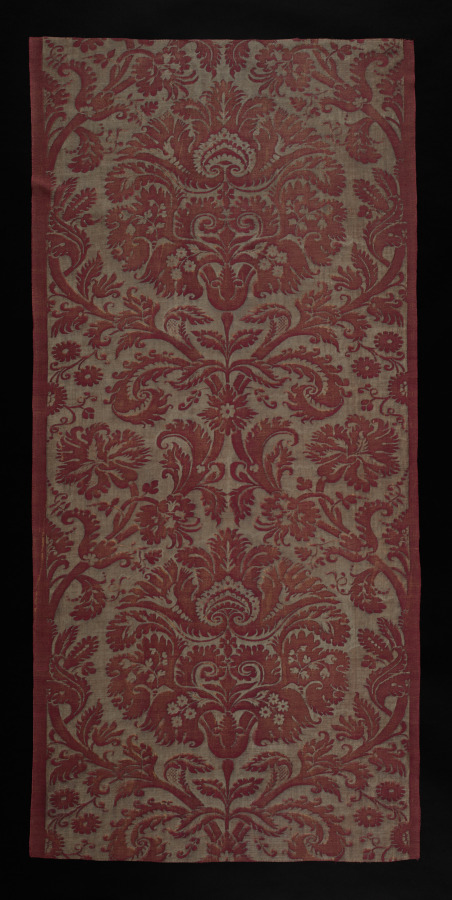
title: Reproduction of a Florentine Velvet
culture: Italy, Venice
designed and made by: Mariano Fortuny y Madrazo (Spanish, 1871–1949)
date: c. 1937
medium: cotton, printed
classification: Textile